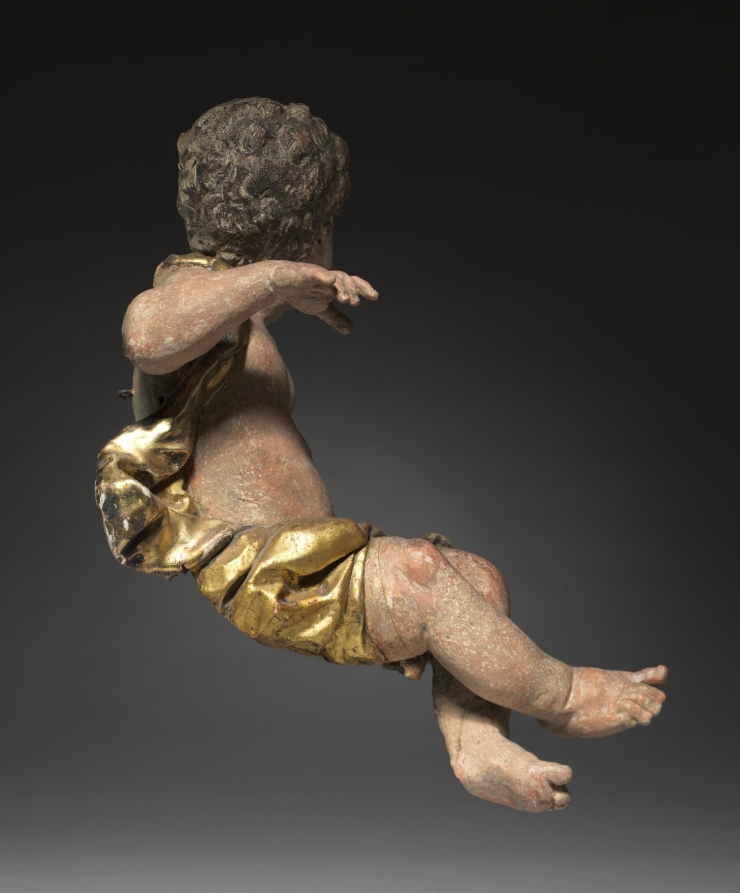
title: Putto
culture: Germany, near Bamberg, 18th century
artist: Ferdinand Tietz (Austrian, 1708–1777)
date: mid-1700s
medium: painted and gilded wood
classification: Sculpture